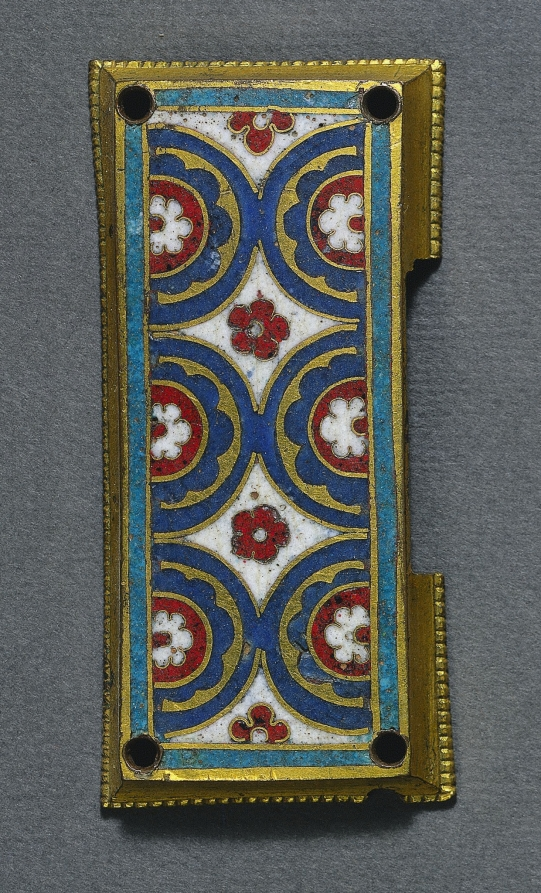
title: Plaque, probably from a Reliquary Shrine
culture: Germany, Rhine Valley, Cologne, Romanesque period, 12th century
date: c. 1180–1190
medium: gilded copper, champlevé and cloisonné enamel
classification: Enamel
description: This enamel plaque has been linked to the original decoration of the Shrine of the Three Kings in Cologne Cathedral, attributed to Nicholas of Verdun, one of the most important goldsmiths of the late 12th century.